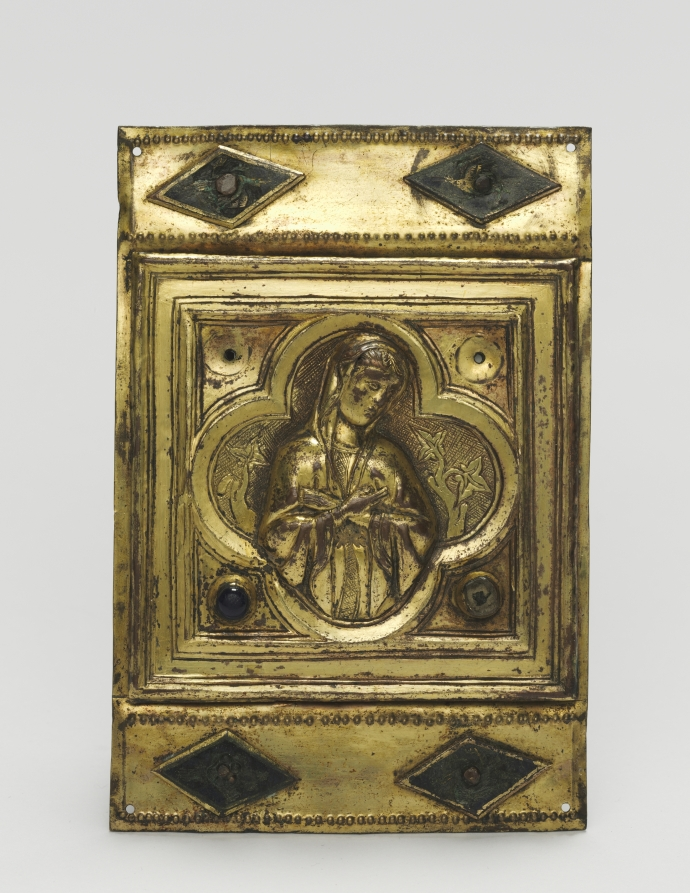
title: Ornamental Plaque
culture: Italy, Tuscany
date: c. 1380–1400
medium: champlevé enamel, glass paste stones, and gilding on copper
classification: Enamel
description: These plaques appear to have been part of a larger ensemble forming a band of decoration affixed to a church altar. Each plaque is decorated in multiple techniques-embossing, engraving, enameling, and gilding-to create a sumptuous visual effect.